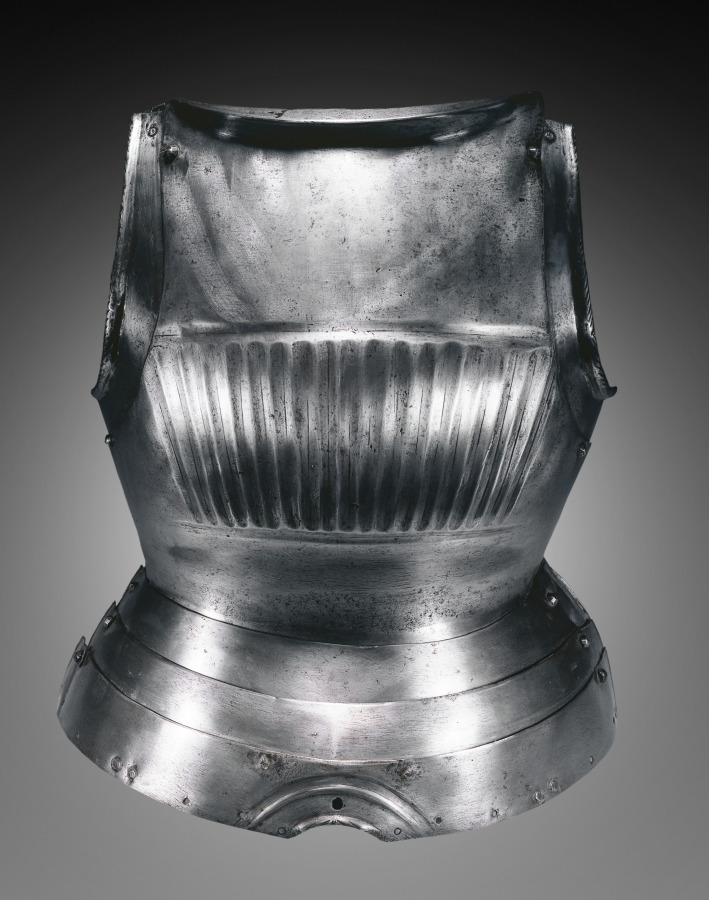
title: Breastplate in the Maximilian Style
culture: Germany, Nuremberg(?), early 16th century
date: c.1510–30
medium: steel, brass rivets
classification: Arms and Armor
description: Distinguished by its regularly fluted surfaces, armor in this style was popularized in South Germany during the early 1500s. The style is usually called "Maximilian," as it was introduced during the reign of Emperor Maximilian I (1493-1519). The style reflects male costume of the period and the shift to the new rounded forms of the Renaissance. Other examples of this armor style may be seen nearby.